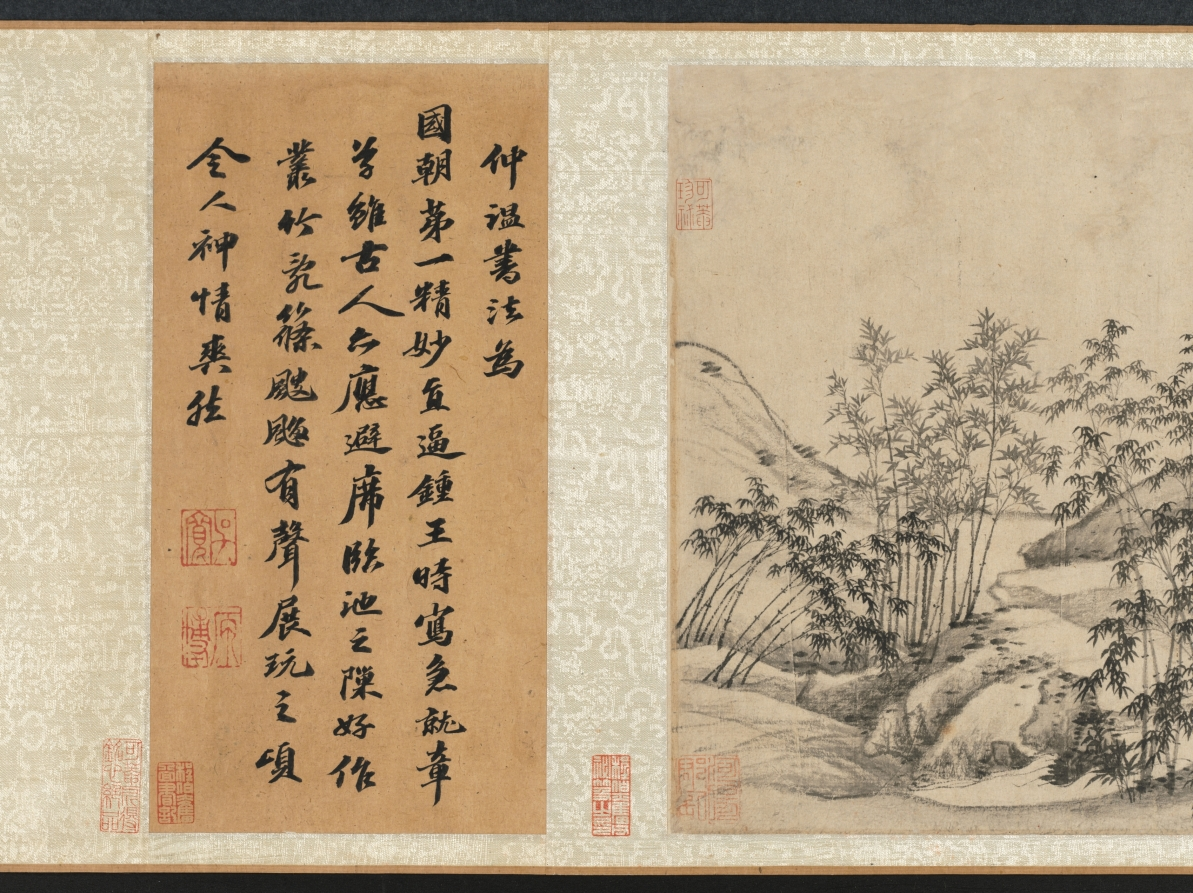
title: Landscape with Bamboo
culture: China, Yuan dynasty (1271-1368)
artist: Song Ke (Chinese, 1327–1387)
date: 1300s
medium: Handscroll; ink on paper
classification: Painting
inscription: 東吳宋克戲為仲幾畏友圖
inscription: 2 colophons and 14 additional seals: 1 seal of Yü Chung-chi (14th c.); 1 seal of Wu Ch'eng (1469 jinshi); 1 colophon and 2 seals of Wu K'uan (1435–1504); 1 colophon and 9 seals of Cheng Qi (1911–1988); 1 seal unidentified.